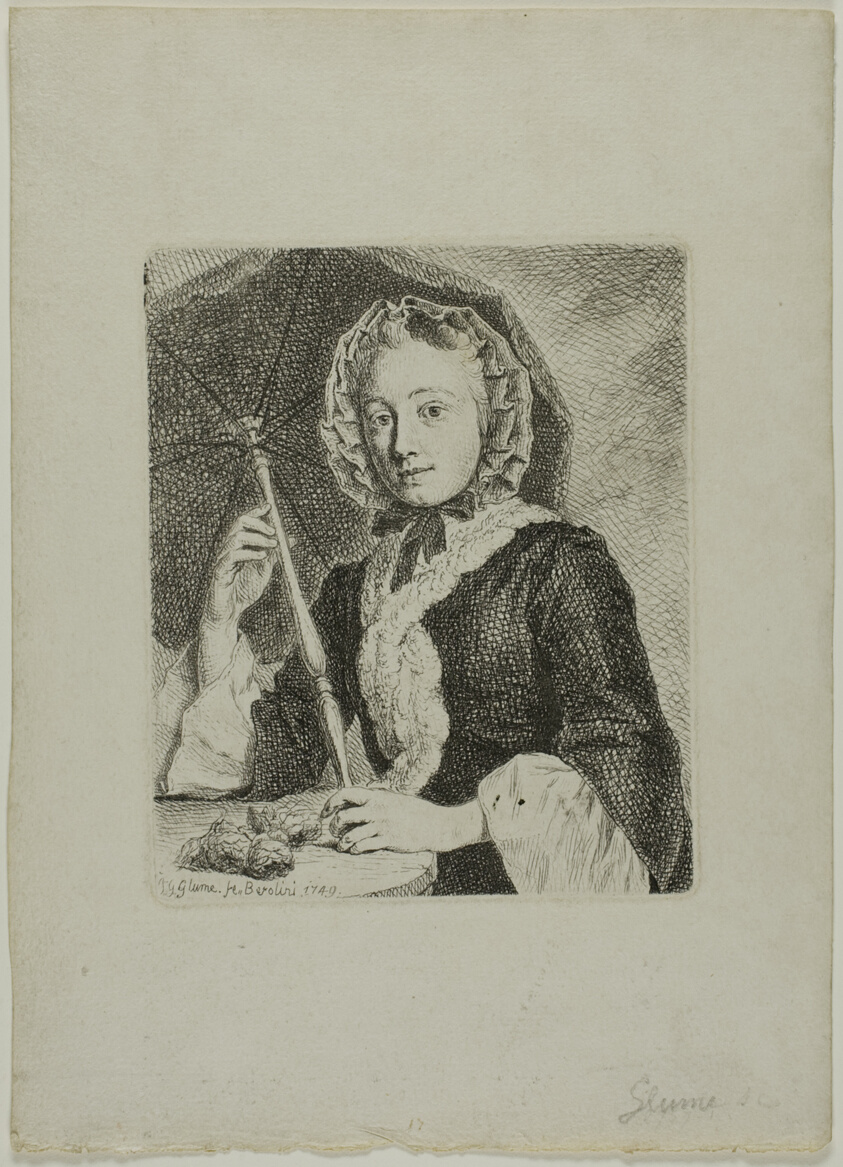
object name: Print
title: Woman with a Parasol (Mrs. Friedrich Christian Glume, Sister-in-Law of the Artist)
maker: Johann Gottlieb Glume (German, 1711-1778)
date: 1749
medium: Etching in black on cream laid paper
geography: Germany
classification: etching; paper; print; prints and drawing